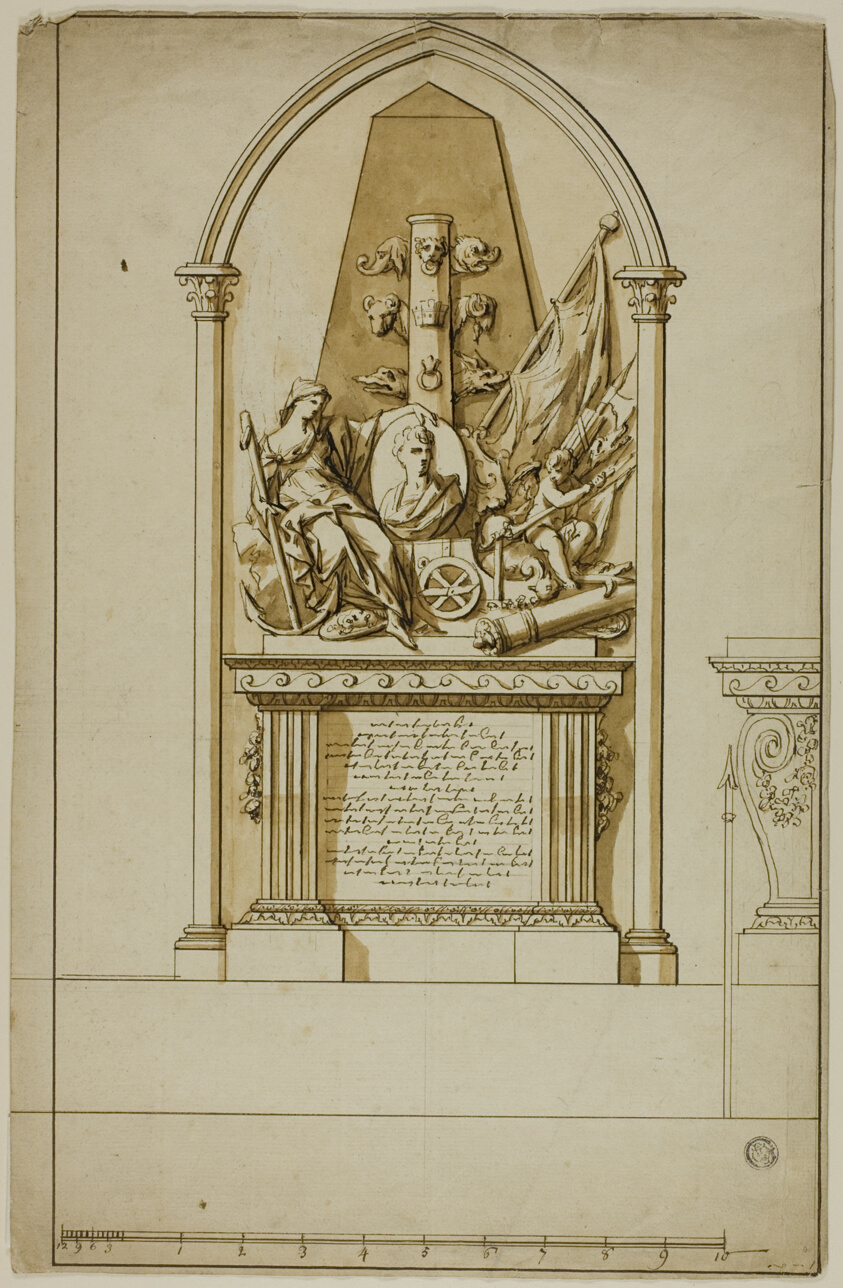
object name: Drawing and Watercolor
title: Design for an Unexecuted Funerary Monument for the First Duke of Marlborough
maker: John Michael Rysbrack (Flemish, 1693-1770); or James Thornhill (English, 1675-1734)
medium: Pen and brown ink, with brush and brown wash, over traces of graphite, on cream laid paper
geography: Flanders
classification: pen and ink drawings; drawings (visual works); prints and drawing